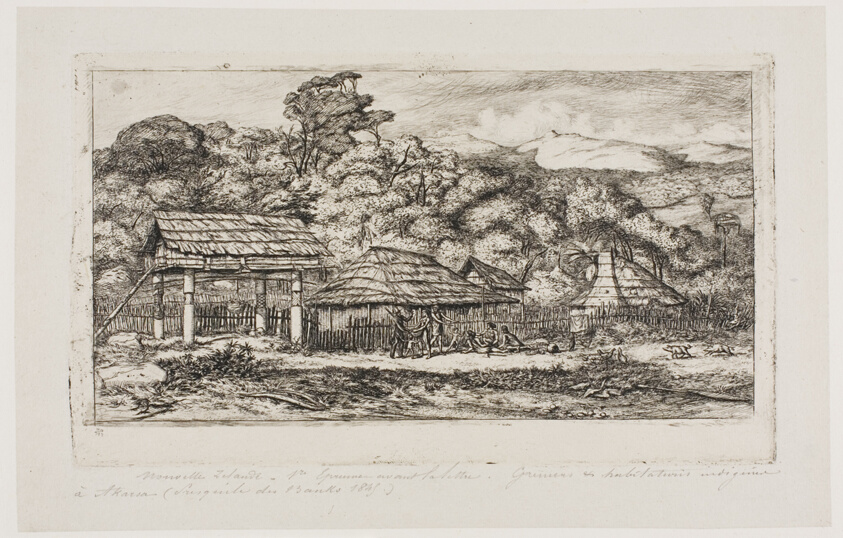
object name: Print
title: Native Barns and Huts at Akaroa, Banks' Peninsula, 1845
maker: Charles Meryon (French, 1821-1868)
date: 1865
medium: Etching and drypoint on grayish ivory laid paper, laid down on ivory laid paper, hinged to cream wove board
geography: France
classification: etching; print; prints and drawing